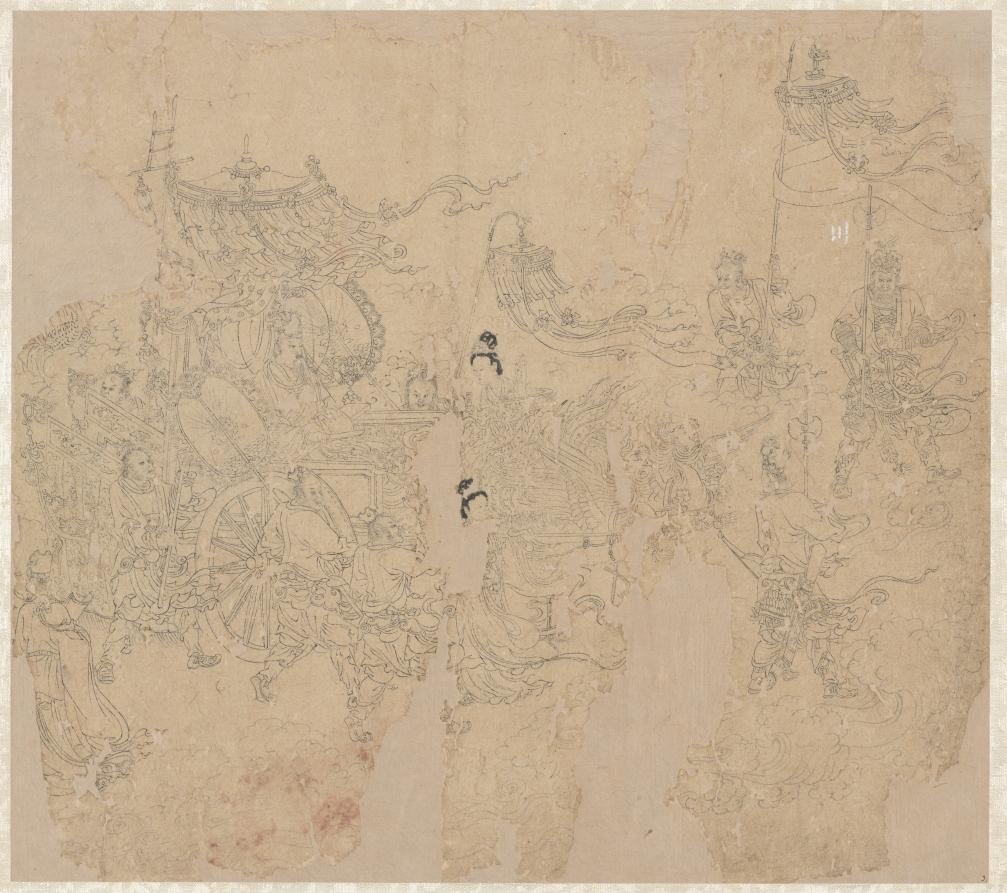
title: Album of Daoist and Buddhist Themes: Procession of Daoist Deities: Leaf 3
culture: China, Southern Song dynasty (1127-1279)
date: 1200s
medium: Album, ink on paper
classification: Painting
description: This extraordinary album has 50 paintings on a variety of religious subjects. They were likely created by several master craftsmen to share with studio apprentices as models for fulfilling commissions. The Jade Emperor and the Daoist pantheon make up the first 26 leaves. On this leaf, the fourth in the album, the Jade Emperor 玉帝 rides over a cloud in his chariot surrounded by his retinue. The next 14 leaves portray the Buddhist Ten Kings of Hell administering punishments to the dead. The third section, called “Clearing the Mountains,” features divine soldiers, led presumably by the deity Erlang Shen 二郎神, fighting undesirable creatures.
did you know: A female attendant holds a tray with a rocky formation, which provides a clue to the Emperor's identity.